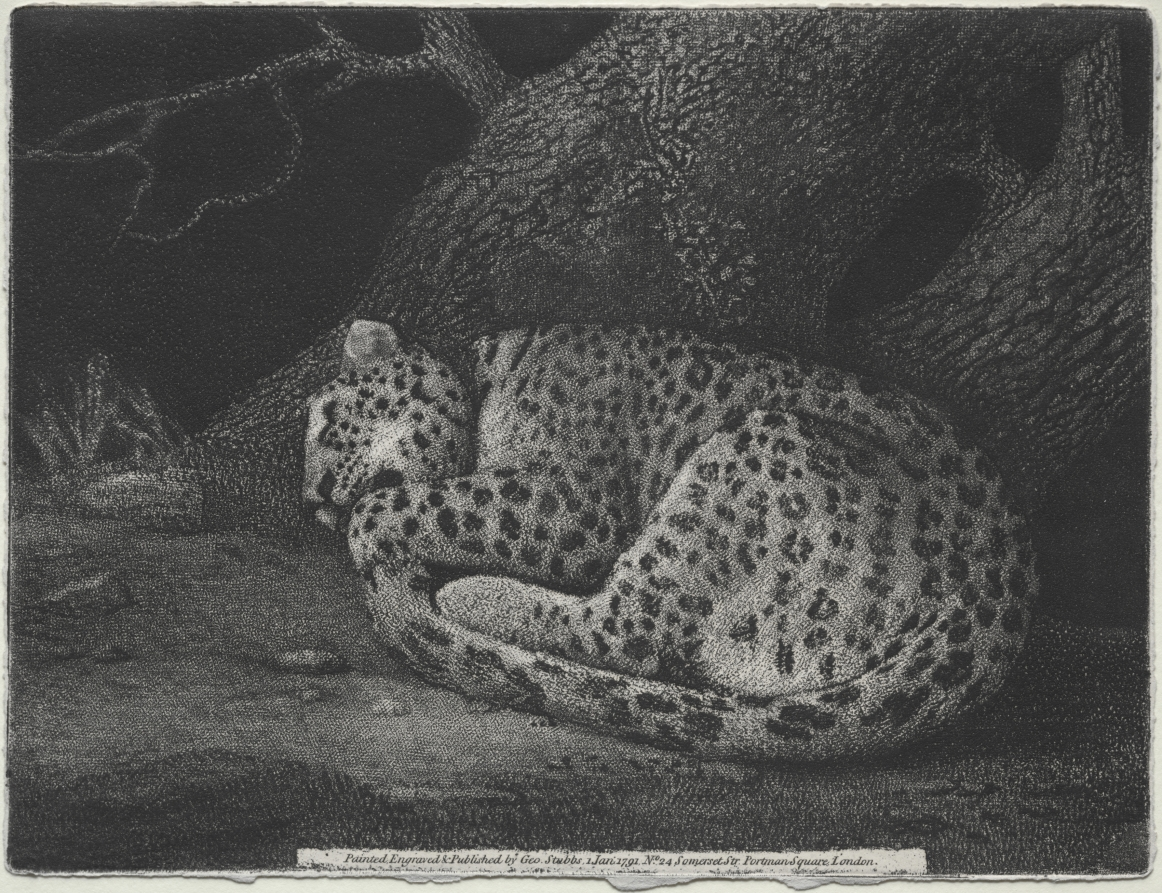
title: A Sleeping Leopard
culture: England, 18th century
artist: George Stubbs (British, 1724–1806)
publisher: George Stubbs (British, 1724–1806)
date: 1791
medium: Soft-ground etching with roulette work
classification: Print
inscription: Printed, lower center: Painted, Engraved & Published by Geo. Stubbs, 1 Jan 1791, No. 24 Somerset Str. Portman Square, London.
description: A famed animal painter, George Stubbs studied anatomy and likely had access to one of London’s various menageries, where he could view animals kept as curiosities and brought to England from across the globe. Here, Stubbs used innovative printmaking techniques to capture the roughness of the tree bark, the rocky surface of the ground, and the softness of the leopard’s fur. Stubbs was one of the earliest artists to experiment with soft-ground etching, which allowed him to re-create texture by transferring his image onto a printing plate through an actual drawing.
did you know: George Stubbs carefully studied the different animals he depicted and even published a book on the anatomy of the horse.